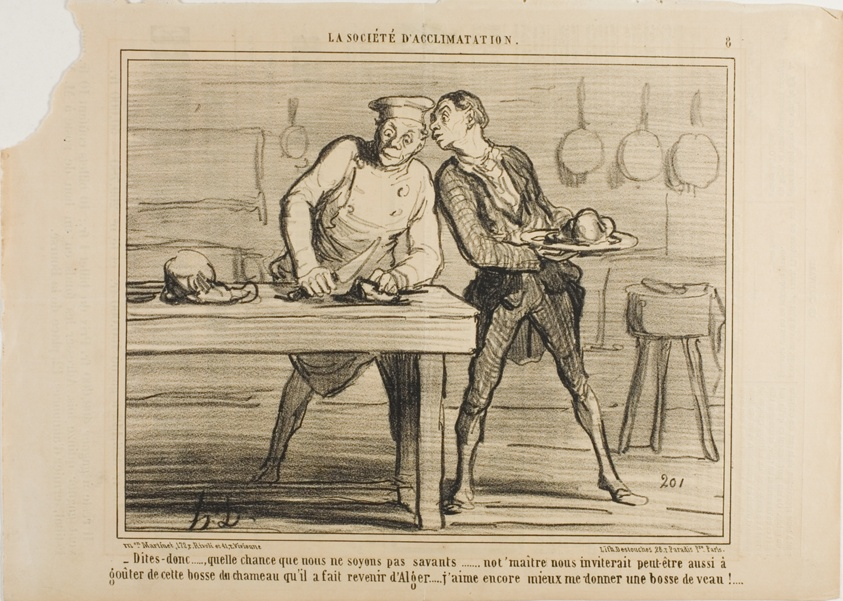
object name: Print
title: “- I am glad that we are not scientists, otherwise Monsieur would also invite us to taste this camel hump he ordered from Algeria… I'd rather enjoy a meal of veal hump!,” plate 8 from La Sopciété D'acclimatation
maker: Honoré Victorin Daumier; French, 1808-1879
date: 1858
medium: Lithograph in black on ivory wove paper, with letterpress verso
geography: France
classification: lithograph; print; prints and drawing